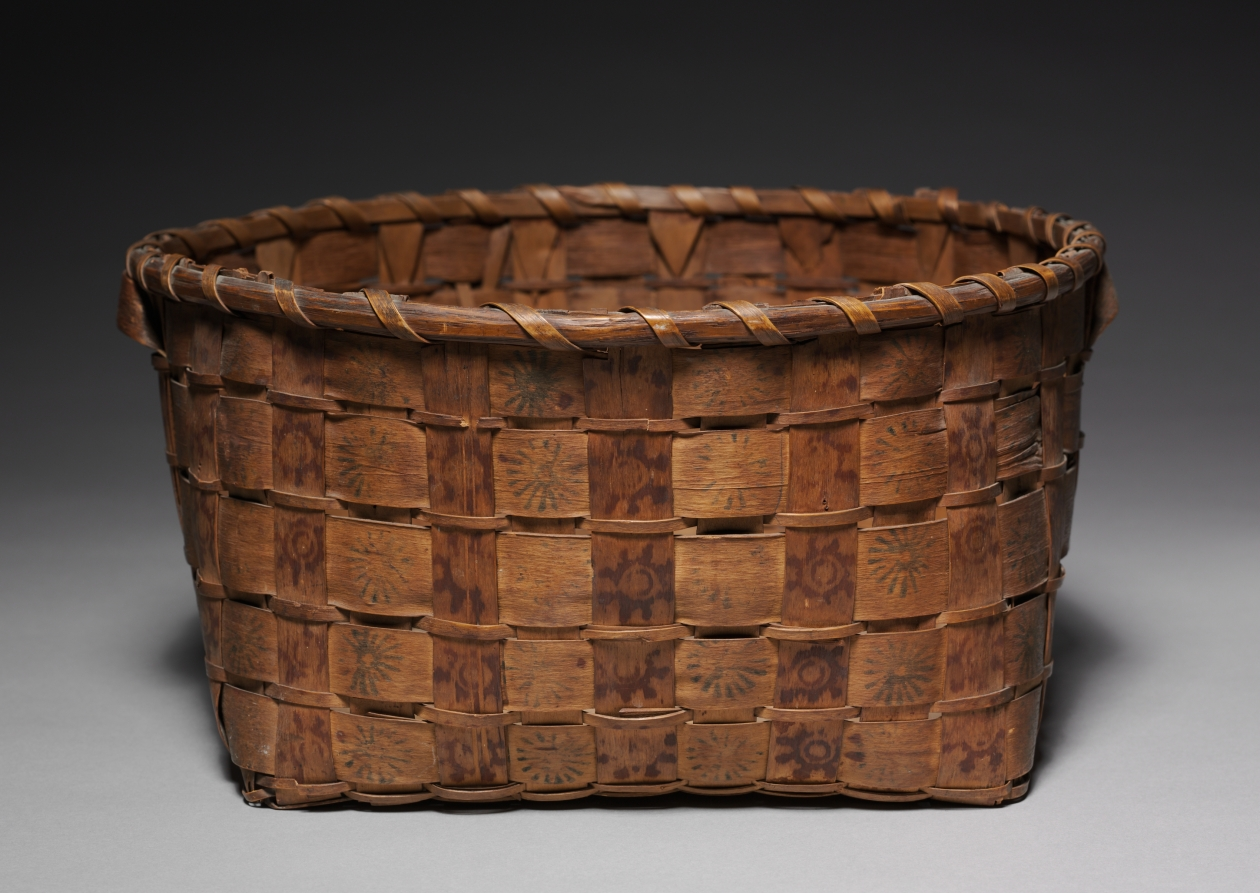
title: Basket with Stamped Decoration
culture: Native North America, Woodlands, Algonquian or Haudenosaunee (Iroquois), Post-contact Period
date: early 1800s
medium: ash? strips, pigment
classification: Basketry